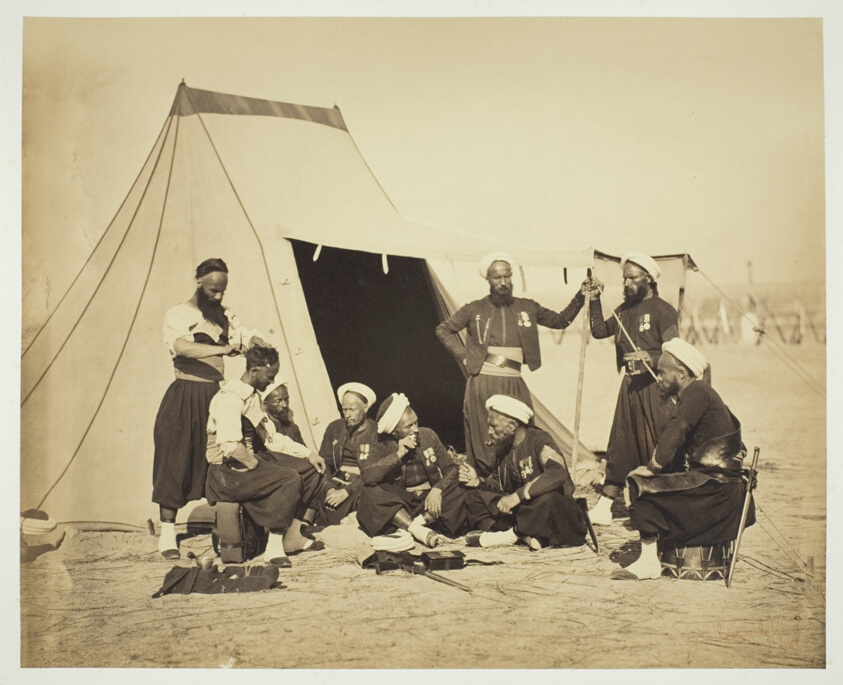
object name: Photograph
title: Untitled (Zouaves)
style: 19th century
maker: Gustave Le Gray (French, 1820–1884)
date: 1857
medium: Albumen print, from the album "Souvenirs du Camp de Châlons"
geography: France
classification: albumen silver print; photographic process; photography; photograph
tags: Paris